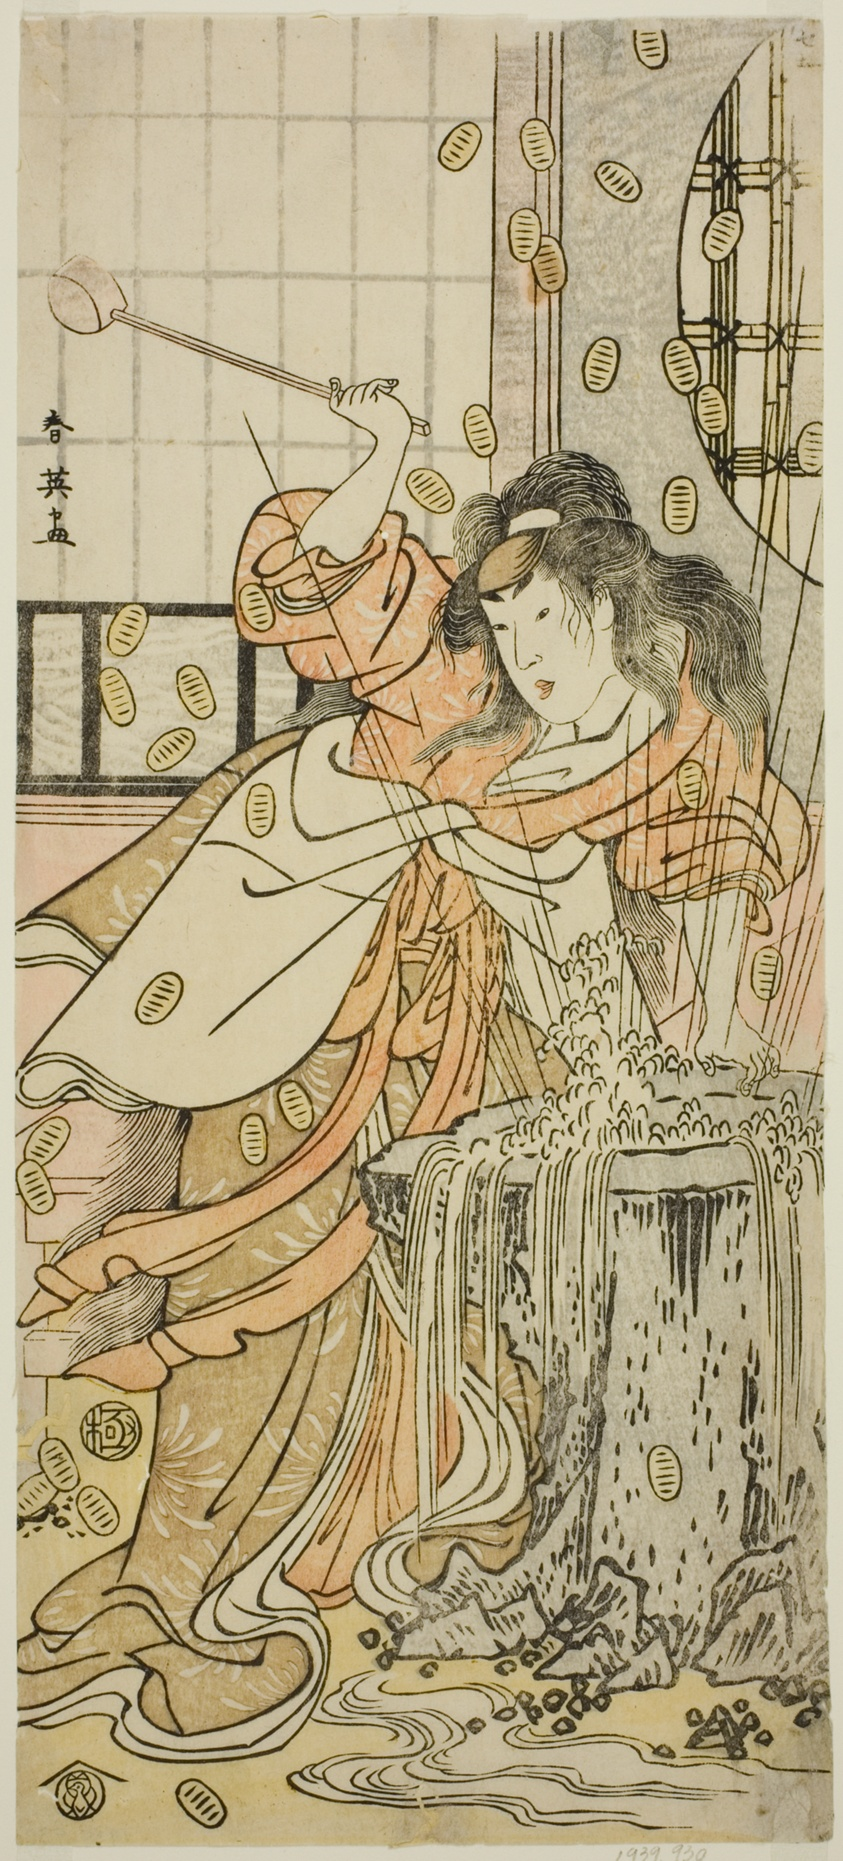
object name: Print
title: The Actor Segawa Kikunojo III as the Dragon Maiden Disguised as Osaku in the Play Sayo no Nakayama Hiiki no Tsurigane, Performed at the Nakamura Theater in the Eleventh Month, 1790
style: Japanese (culture or style)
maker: Katsukawa Shun'ei (Japanese, 1762-1819)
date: c. 1790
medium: Color woodblock print; hosoban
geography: Japan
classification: woodblock print; print; asian art